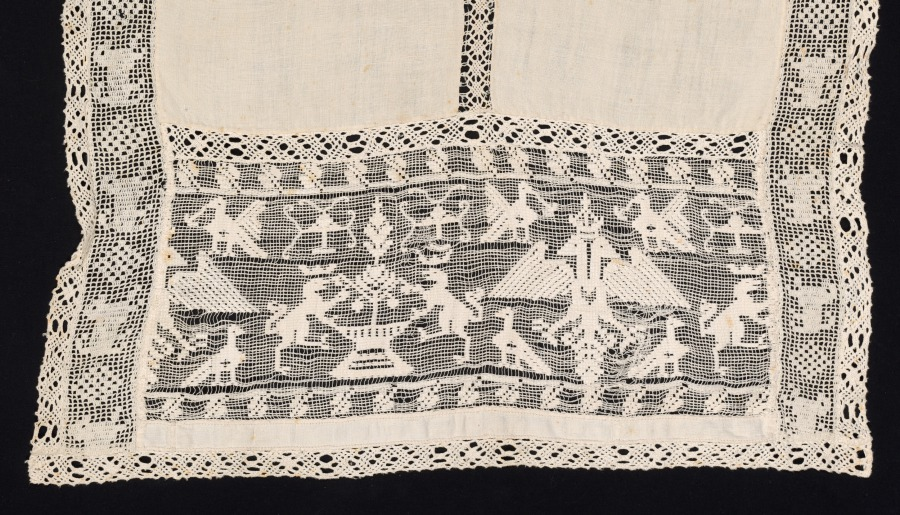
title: Cloth with Border of Crowned Double-Headed Eagles with Various Emblems, Birds, and Other Animals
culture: Italy, 1800s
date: 1800s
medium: Bleached linen (est.): needle lace, burato (twined ground and darned in two directions), bobbin lace insert and edging, and crochet insert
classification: Lace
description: A range of techniques were used to create textural variation in this lace cloth: buratto, bobbin, and crochet. Figural motifs appear within the inserted buratto bands. Different birds, with crosses visible on their chests, crowned double-headed eagles, and feline figures facing a vessel may allude to the heraldic symbols of a particular family.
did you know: This cloth was given to the museum by Louise Tifft Brown, a native Clevelander who became an expert in lace while living in Venice for 35 years.